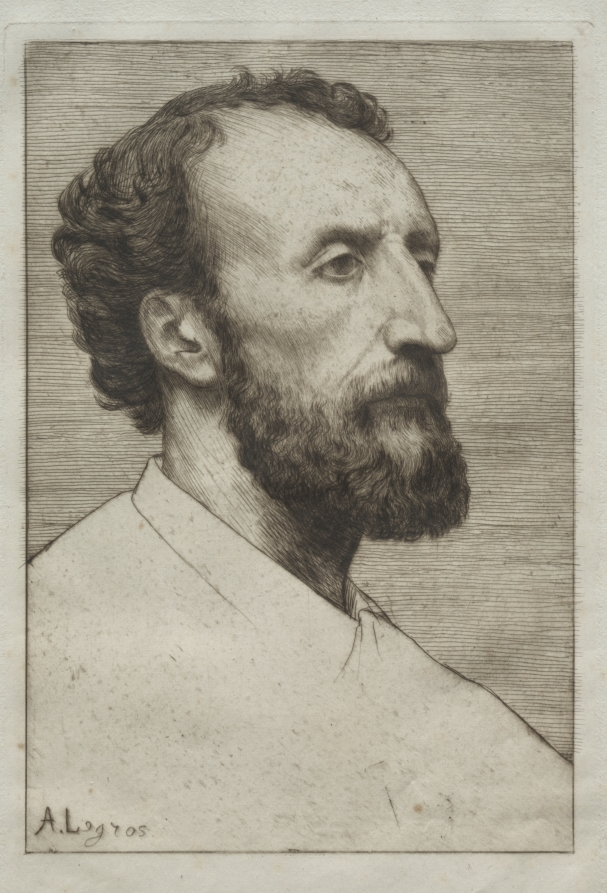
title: Jules Dalou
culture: France, 19th century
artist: Alphonse Legros (French, 1837–1911)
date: 1877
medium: etching and drypoint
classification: Print